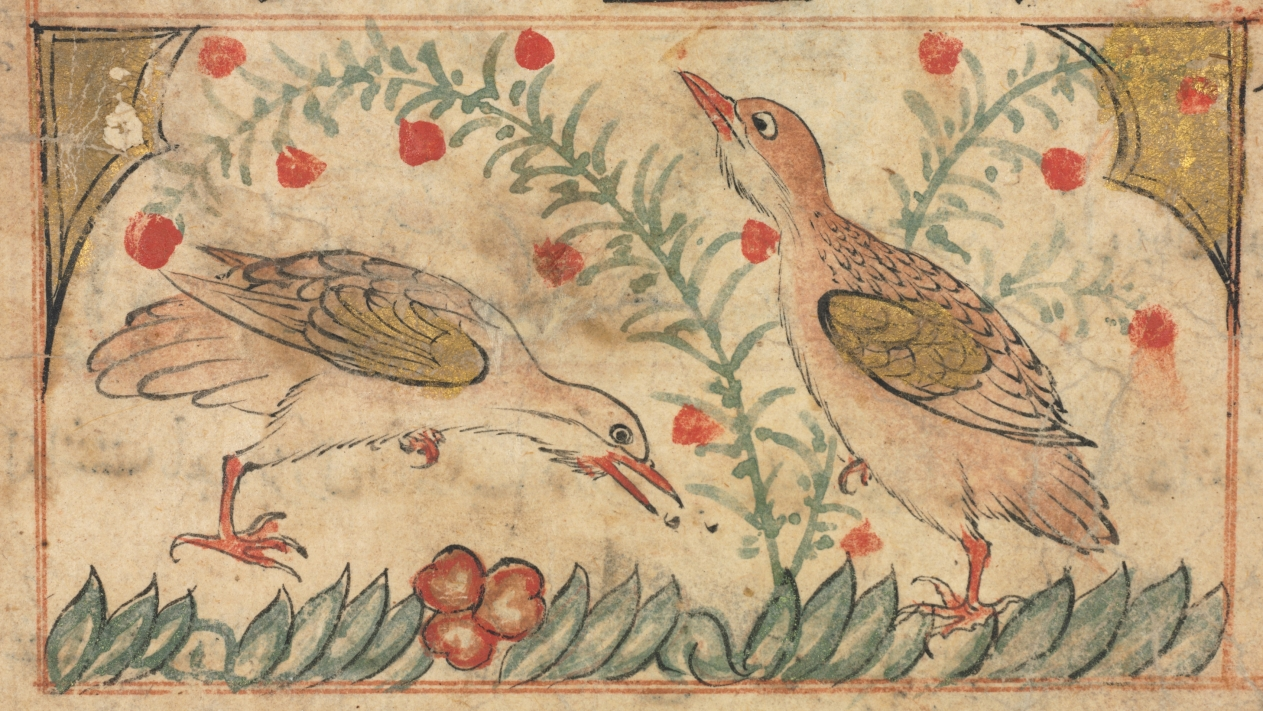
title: Folio from a Persian Manafi‘ al-Hayawan (The Benefits of Animals) of Abu Said Ubaid-Allah ibn Jibrail ibn Bakhtishu (died 1058–68) (verso)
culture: Iran, Maragah, Ilkhanid period (1256–1353)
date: c. 1300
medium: opaque watercolor, ink, and gold on paper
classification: Manuscript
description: The Benefits of Animals describes the physical characteristics of many different animals and provides their medicinal uses at the time. Most of the text on this page is a continuation of a section about doves from the previous page. It says, for example, that blood from dove wings cures sore eyes and cooked dove egg mixed with honey and a little borax is good for those with liver complaints. The large title written in Kufic script near the bottom of the page translates as “The Quail and its Qualities and Benefits,” marking the beginning of the next section. The illustration depicts two quails in active postures. The Mongol ruler of Iran from 1295 to 1304, Ghazan Khan, commissioned a Persian translation of the Arabic text, and this important page is from one of the earliest illustrated manuscripts.